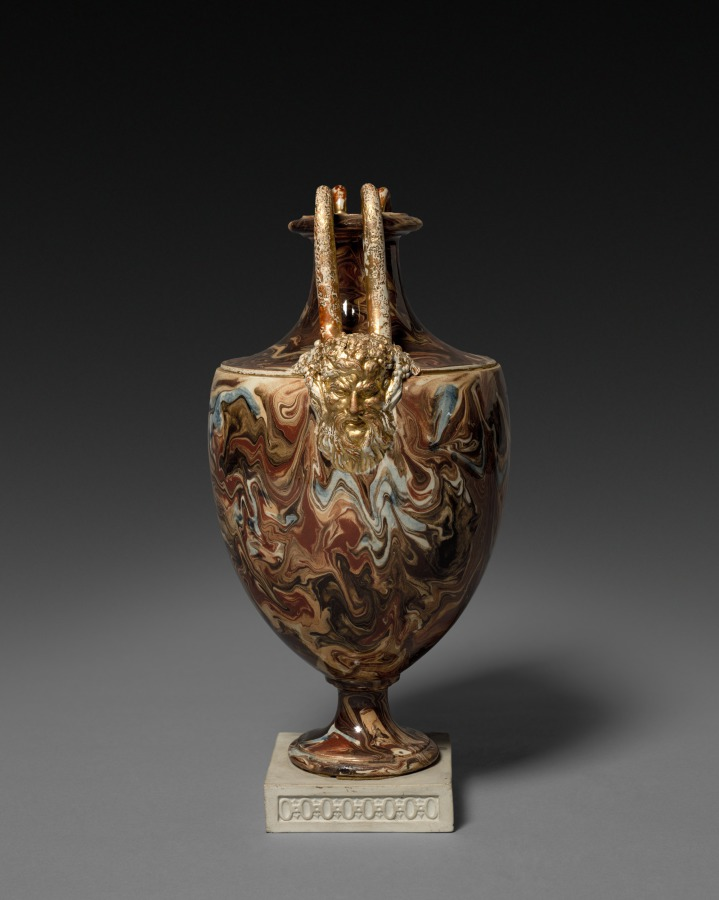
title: Agateware Vase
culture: England, Staffordshire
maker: Wedgwood and Bentley (British, Staffordshire, 1769–1780)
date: c. 1770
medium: marbled earthenware (agateware) with gilt decoration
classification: Ceramic